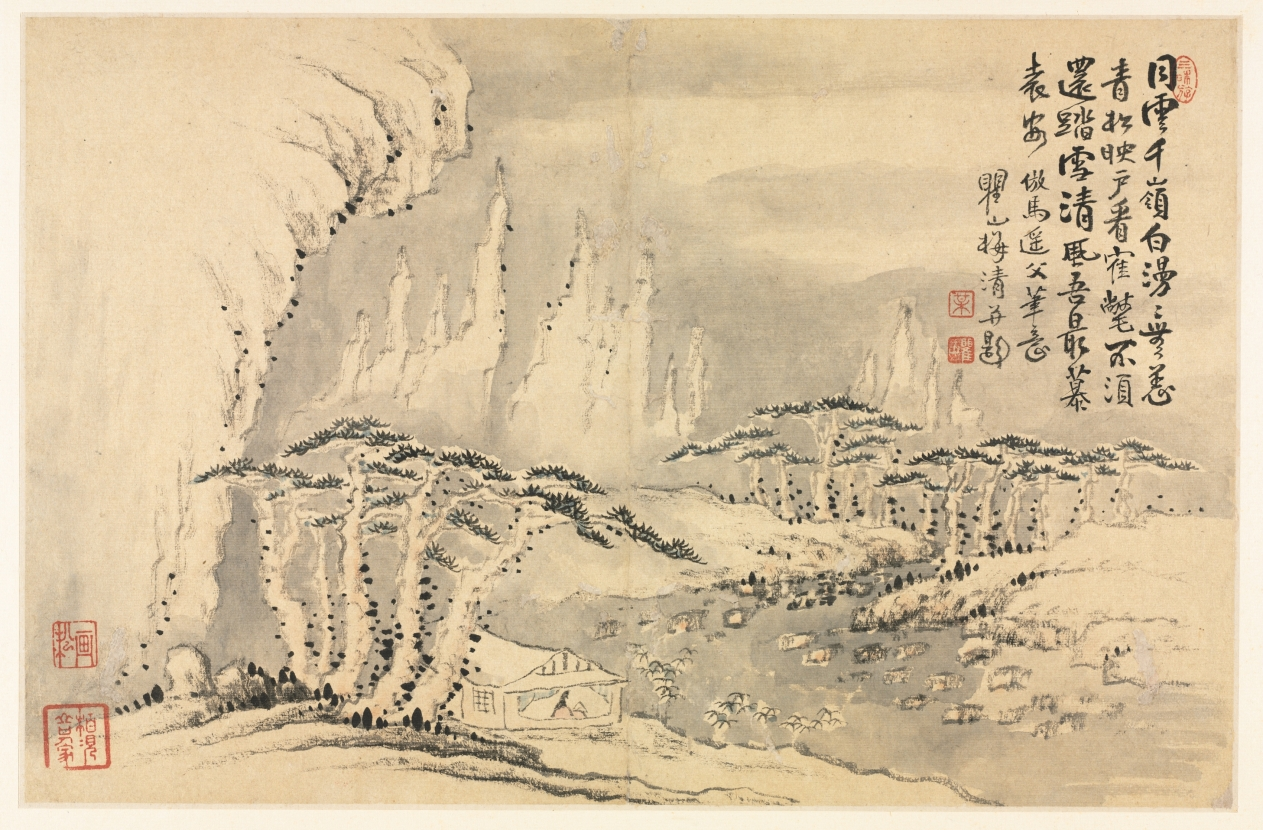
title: Landscapes in Various Styles after Old Masters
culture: China, Qing dynasty (1644-1911)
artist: Mei Qing (Chinese, 1623–1697)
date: 1690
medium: album leaf: ink and color on paper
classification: Painting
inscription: [印] 三昧遊. 同雲千嶺白漫漫，無恙青松映戸看。 鶴氅不須還踏雪，清風我最慕袁安。 仿馬遠父筆意。瞿山梅清並題。[印] 梅; 瞿山 [印, 左下]画松; 柏梘山口人家.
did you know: Mei Qing’s visits to Huangshan were in the spring and summer, so this wintry scene was a product of his imagination.